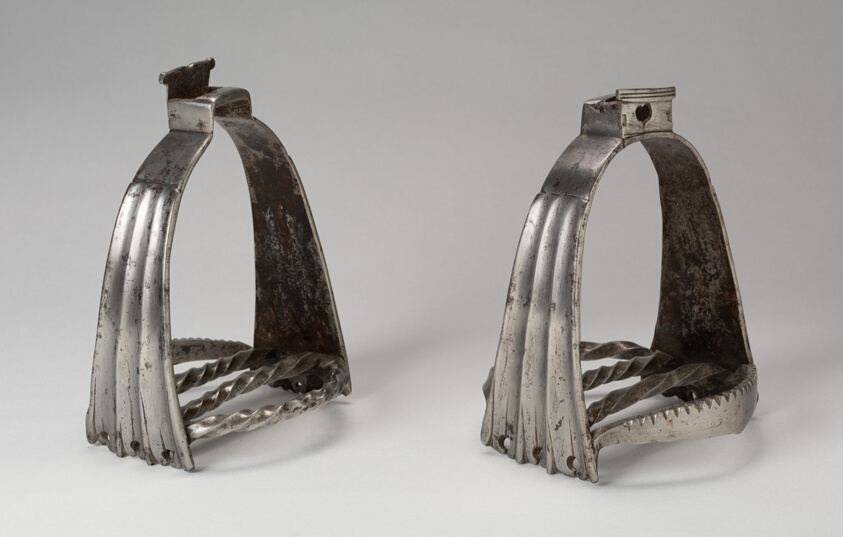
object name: Armor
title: Pair of Stirrups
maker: German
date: 16th century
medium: Iron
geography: Germany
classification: horse equipment; armor; arms and armor